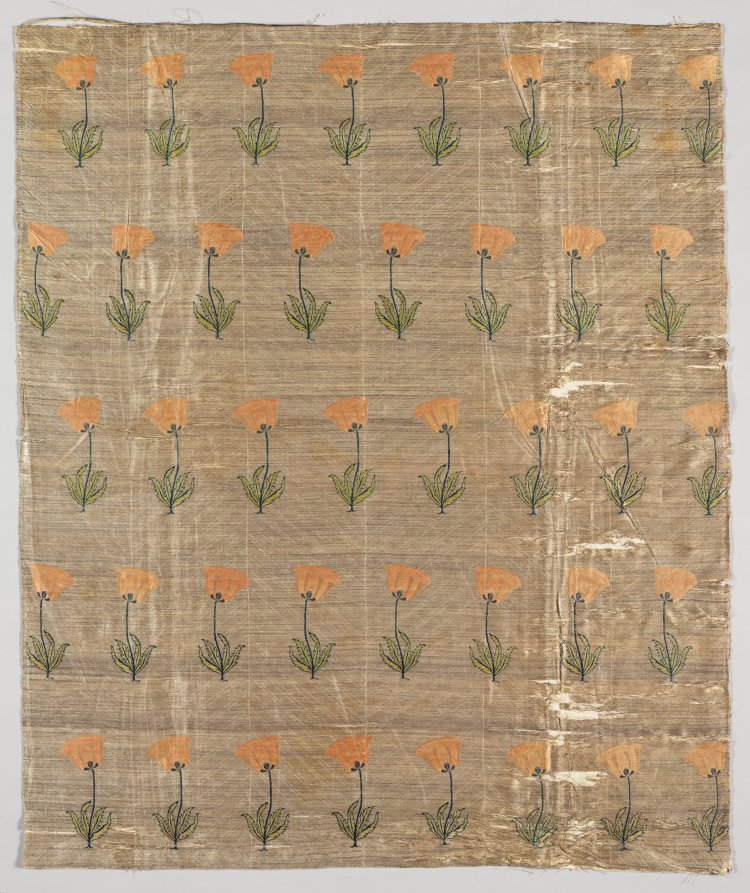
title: Textile with field of poppies on a golden ground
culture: Iran, Safavid period (1501–1722)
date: 1600–1750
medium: silk and gilt-metal thread: twill weave with supplementary weft, stamped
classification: Textile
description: Trade in textiles flourished between India and Iran. Courtly consumers from the neighboring Mughal and Safavid dynasties admired the products of both regions. The subtle chevrons set off rows of poppies that sway in alternating directions, lending a gentle liveliness to the overall pattern. Peach and green silk threads interlace to create each poppy in a technique that uses discontinuous wefts and allows for a smooth surface finish to this lightweight textile.